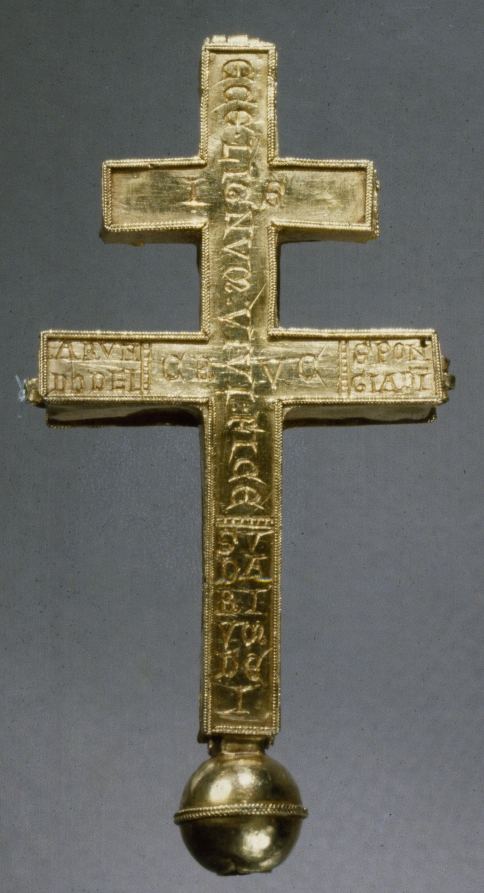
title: Double-Arm Reliquary Cross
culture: Latin Kingdom of Jerusalem, Jerusalem, Gothic period, 12th century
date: c. 1100–1200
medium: gold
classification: Metalwork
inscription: inscribed on center front: ECE: LIGNUM: VIVI: CRUCIS: FICE; at base: SUDARIUM DEI; at each end of main arm: ARUNDO DEI SPONGIA DEI. (Behold the Glorius Wood of the Living Cross: Sudarium of the Lord: Staff of the Lord: Sponge of the Lord).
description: This elegant double-arm cross once contained fragments of four of the most important relics of Christ’s Passion, namely a portion of the True Cross, a piece of Christ’s sudarium (sweat cloth), and fragments of the reed staff and sponge used by Christ’s tormentors to mock him and give him vinegar for his thirst during the Crucifixion. The identity of these relics and their placement in the cross are indicated by open cavities on the reliquary’s front and accompanying Latin inscriptions on its back.